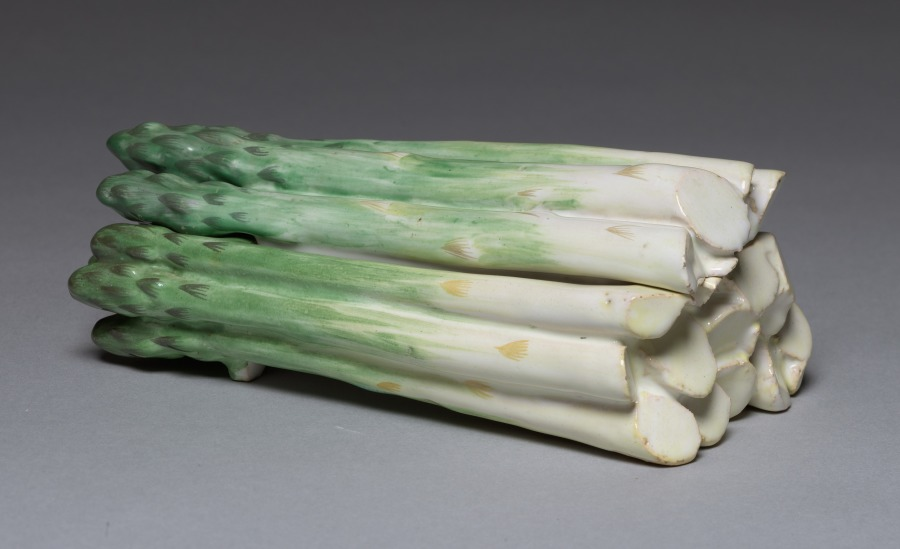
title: Box in the Form of Asparagus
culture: France, Sceaux(?), 18th century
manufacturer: probably by Sceaux Factory (French, active 1748–66)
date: c. 1765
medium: tin-glazed earthenware (faience) with enamel decoration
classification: Ceramic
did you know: Placed upon the dinner table, this container's lid might be lifted to reveal steaming asparagus. Imagine a wealthy 18th-century dining room with flickering candles, whimsical sculptures, and dishes like this decorating the table.